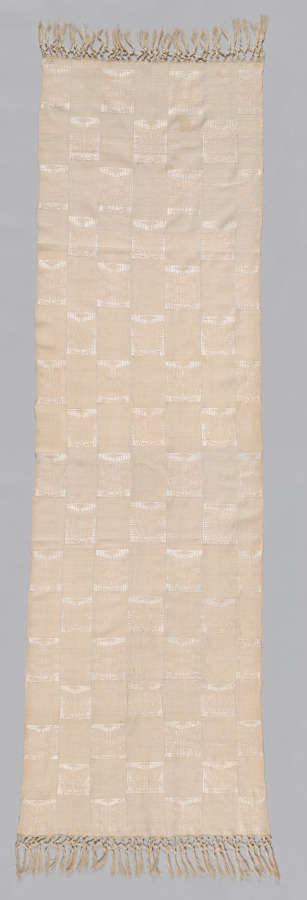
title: One of a pair of shawls (Lamba Landy Fotsy)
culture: Africa, East Africa, Madagascar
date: 1900s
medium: Silk (Bombyx mori and Borocera cajani)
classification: Textile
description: A lamba is an untailored textile worn by all ages, classes, and genders across much of Madagascar. This is an example of a woman’s garment made after Queen Ranavalona II made Christianity the state religion of the Merina Kingdom. Soon after, all-white lamba became popular for both Sunday church and daily wear. Fotsy is white in the Malagasy language. Indicating its owner’s worldliness, the white-on-white patterns alluded to fashionable imported textiles with damask patterns.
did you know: Invented in the mid-1800s, shawls like this were popular until about 2000.